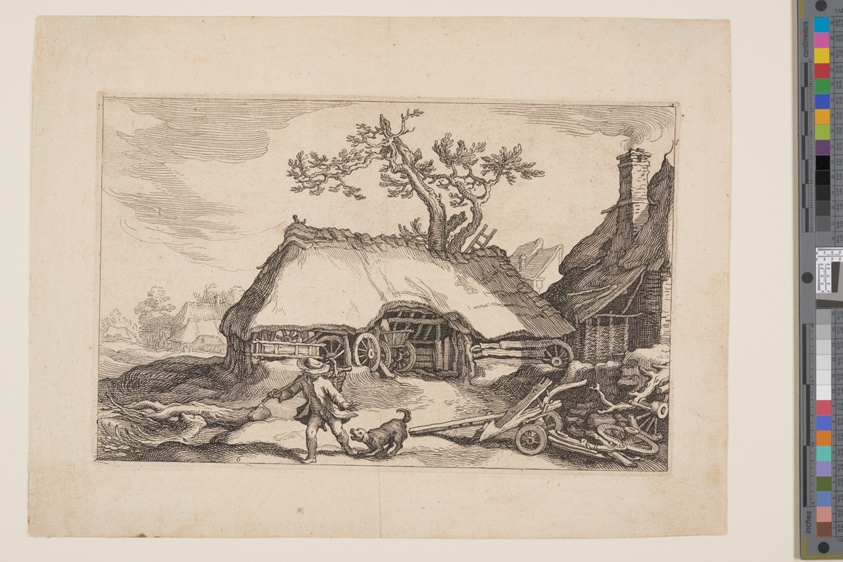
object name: Print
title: Plate 6, from Landscapes with Farmhouses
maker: Boëtius Adamsz. Bolswert (Flemish, 1580–1633); after Abraham Bloemaert (Dutch, 1566–1651)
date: 1614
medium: Etching on ivory laid paper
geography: Flanders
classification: print; paper; prints and drawing; etching